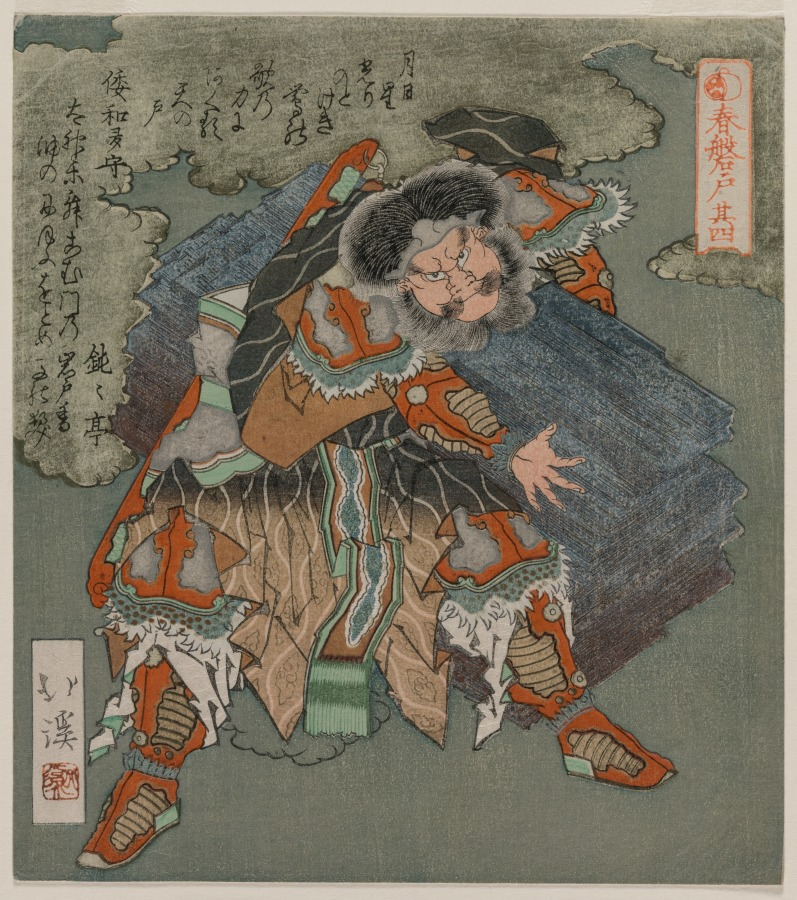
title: Ama no Tajikara no Mikoto from The Cave Door of Spring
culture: Japan, Edo period (1615–1868)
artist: Totoya Hokkei (Japanese, 1780–1850)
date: 1825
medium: fourth of a pentaptych of woodblock prints; ink and color on paper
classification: Print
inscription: Signature: Hokkei Seal: Hokkei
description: These elegant surimono prints come from a set of five images inspired by the legend of the Shinto Supreme Sun Goddess, Amaterasu. She was once so offended by her brother that she retreated to a cave, leaving the earth in darkness. Several attempts to lure her out with cocks crowing, music-making, and a goddess dancing failed, but a mirror hung from a nearby tree made Amaterasu curious, bringing her to the entrance of the cave. A stone was quickly placed at the entrance to block her way back into the cave, and light was restored to the world. Each print is set against a blue evening sky with embossed clouds enriched with gold, silver, and copper.